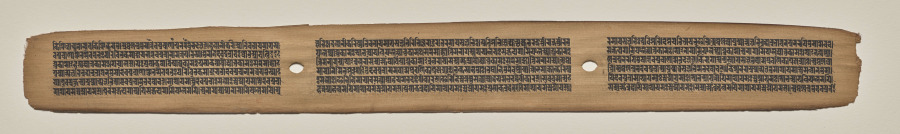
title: Text, Folio 14 (recto), from a Manuscript of the Perfection of Wisdom in Eight Thousand Lines (Ashtasahasrika Prajnaparamita-sutra)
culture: Eastern India, Bihar, Vikramashila Monastery. Painting: Nepal, Kathmandu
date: Sunday, September 14, 1119 (year 239 of the Newar Samvat in the month of Ashvina)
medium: gum tempera and ink on palm leaves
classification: Painting